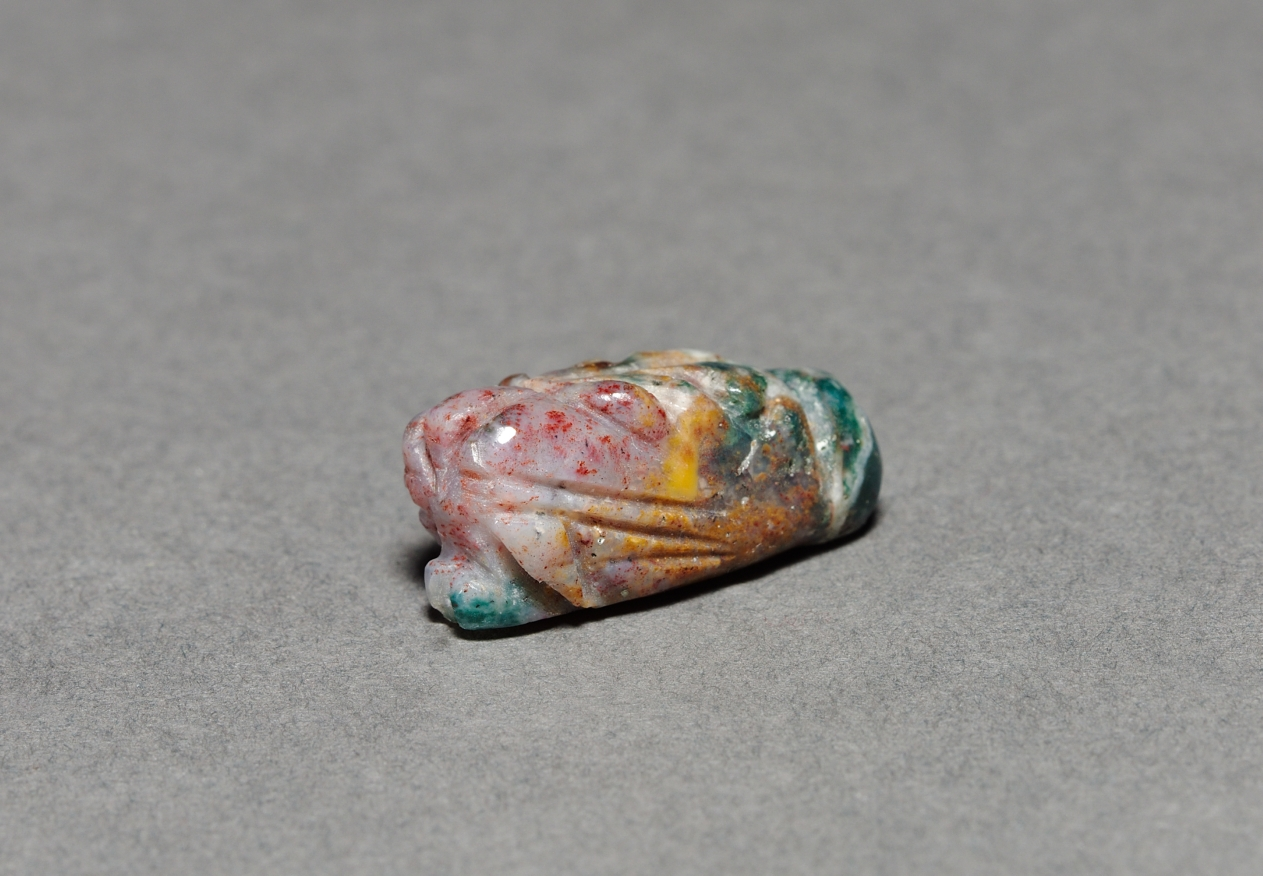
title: Serpent Labret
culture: Mexico, Oaxaca, Xoxo, Mixtec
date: 1200–1519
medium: varicolored stone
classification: Sculpture